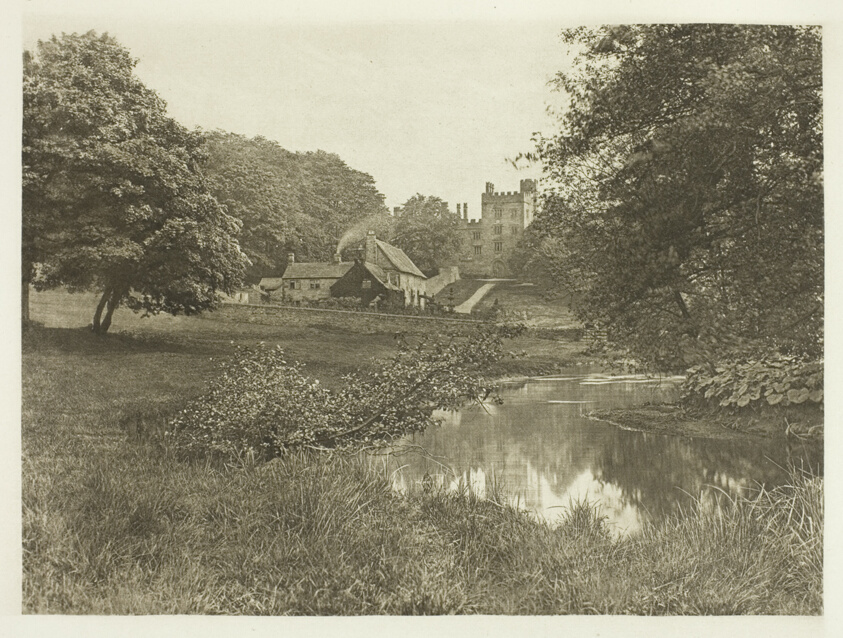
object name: Photograph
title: Haddon Hall and Homestead, From the River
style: 19th century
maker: Peter Henry Emerson (English, born Cuba, 1856–1936)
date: 1880s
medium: Photogravure, plate XXXIV from the album "The Compleat Angler or the Contemplative Man's Recreation, Volume II" (1888)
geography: England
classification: photogravure; photomechanical process; photography; photograph